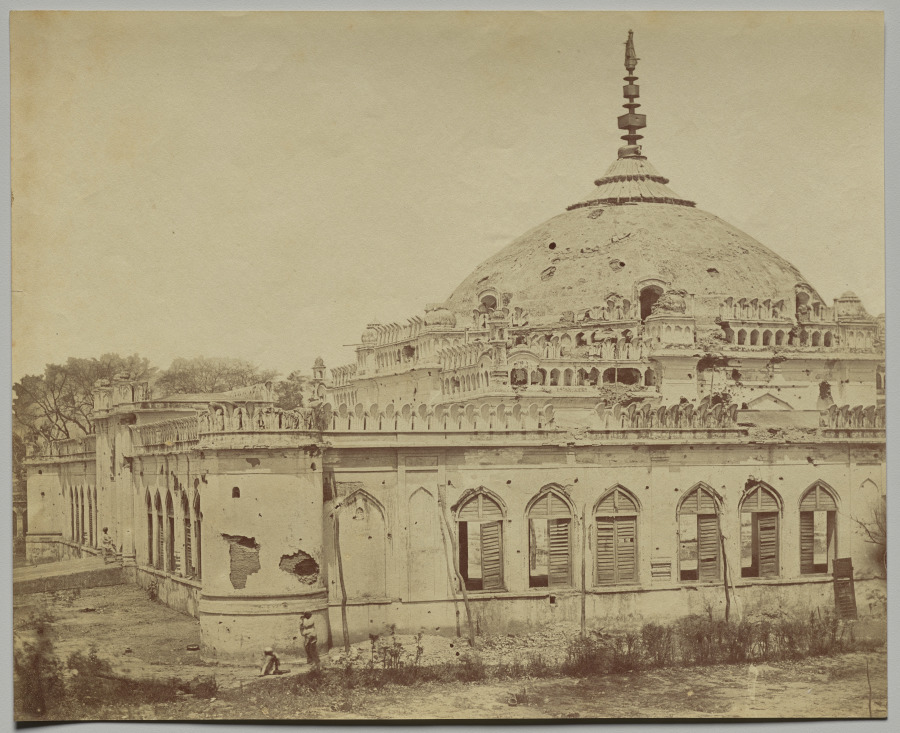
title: Shah Najaf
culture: England, 19th century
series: Lucknow After the Siege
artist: Felice A. Beato (British, 1832–1909)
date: 1858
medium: albumen print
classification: Photograph